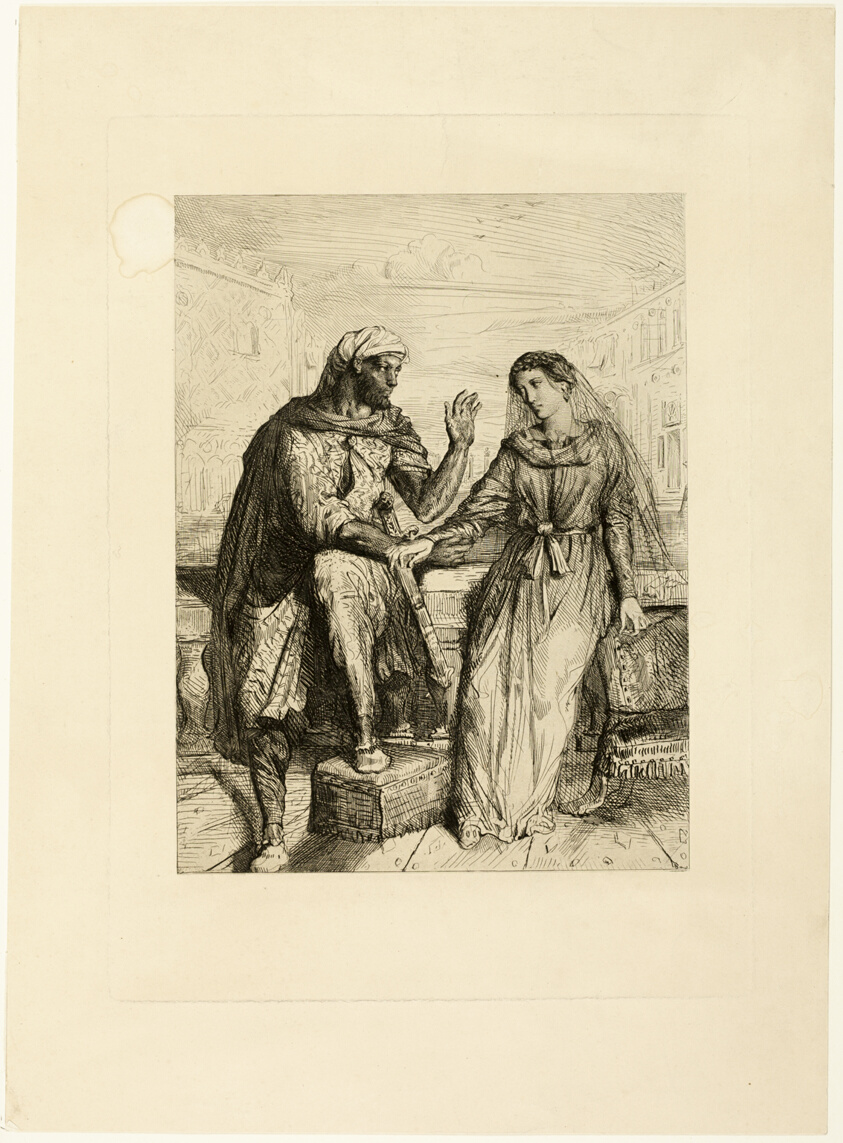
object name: Print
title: She Thank'd Me, plate two from Othello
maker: Théodore Chassériau (French, 1819-1856)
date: 1844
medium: Etching, engraving, roulette and drypoint on ivory China paper, laid down on ivory wove paper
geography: France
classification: etching; print; prints and drawing